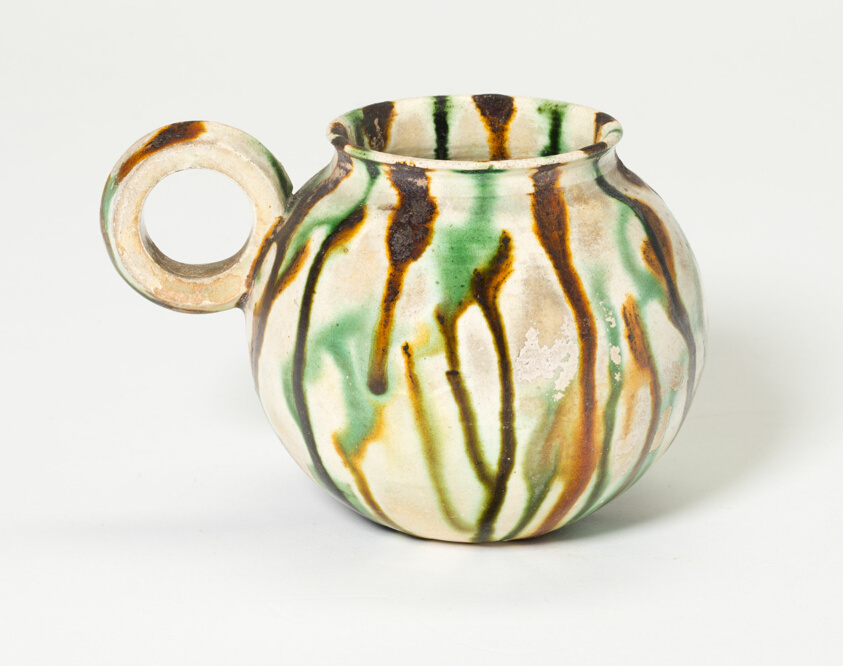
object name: Vessel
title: Ring-Handled Cup with lid with finial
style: Chinese (culture or style)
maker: China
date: Tang dynasty (618–906)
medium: Slip-coated earthenware with three color (sancai) lead glazes, wood and stone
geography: China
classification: drinking vessel; asian art; ceramics; vessel